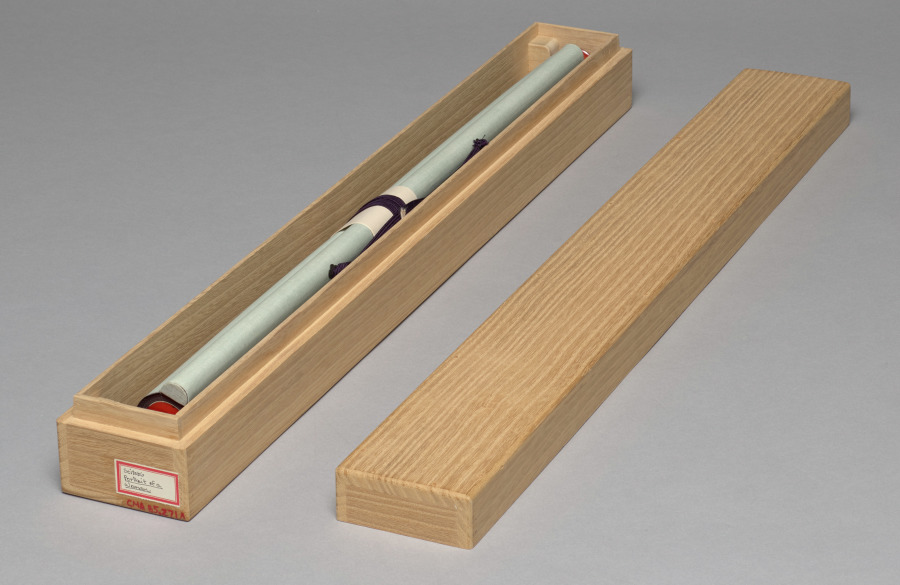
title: A Beauty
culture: Japan, Edo period (1615–1868)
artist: Gion Seitoku (Japanese, active late 1700s–early 1800s)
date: early 1800s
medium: hanging scroll; ink and color on paper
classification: Painting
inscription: 東山画奴井特寫 「字日伯立」白文方印・「せいとく」朱文千鳥印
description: A Kyoto-based ukiyo-e painter, Gion Seitoku specialized in portraying women from Gion and Shimabara, licensed brothel districts in that city. He was known for detailing faces with subtle modeling to heighten a sense of realism. During the 1700s and 1800s, wearing iridescent, greenish lip gloss made from safflower was in vogue. In addition, Japanese women almost universally practiced the custom of artificially blackening their teeth with a stain.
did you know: The person's lipstick is made from safflower.